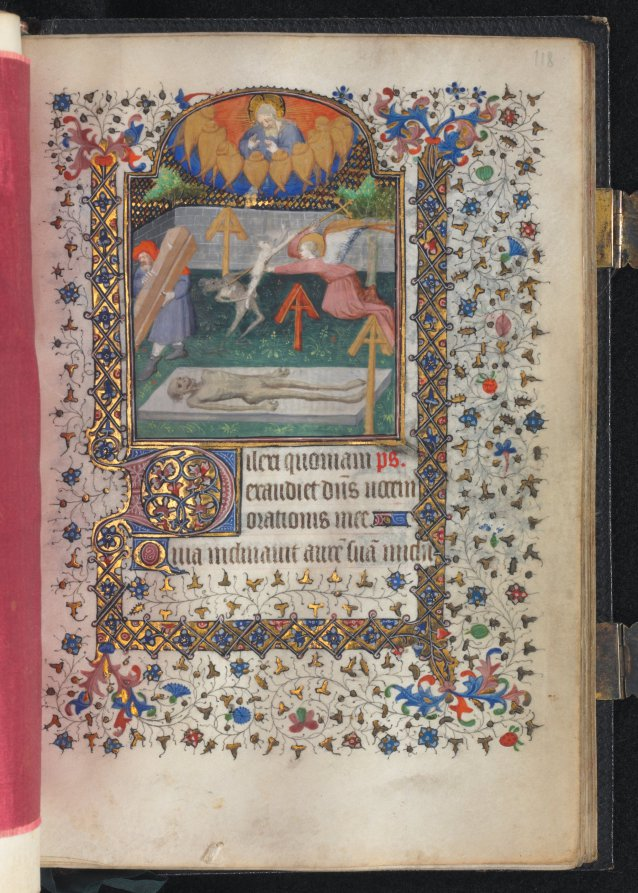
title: Book of Hours (Use of Paris): Fol. 118r, Angel and Devil Fighting over a Soul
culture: France, Paris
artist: possibly studio or workshop of The Bedford Master (French, Paris, active c. 1405–30)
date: c. 1420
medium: ink, tempera, and gold on vellum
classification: Bound Volume